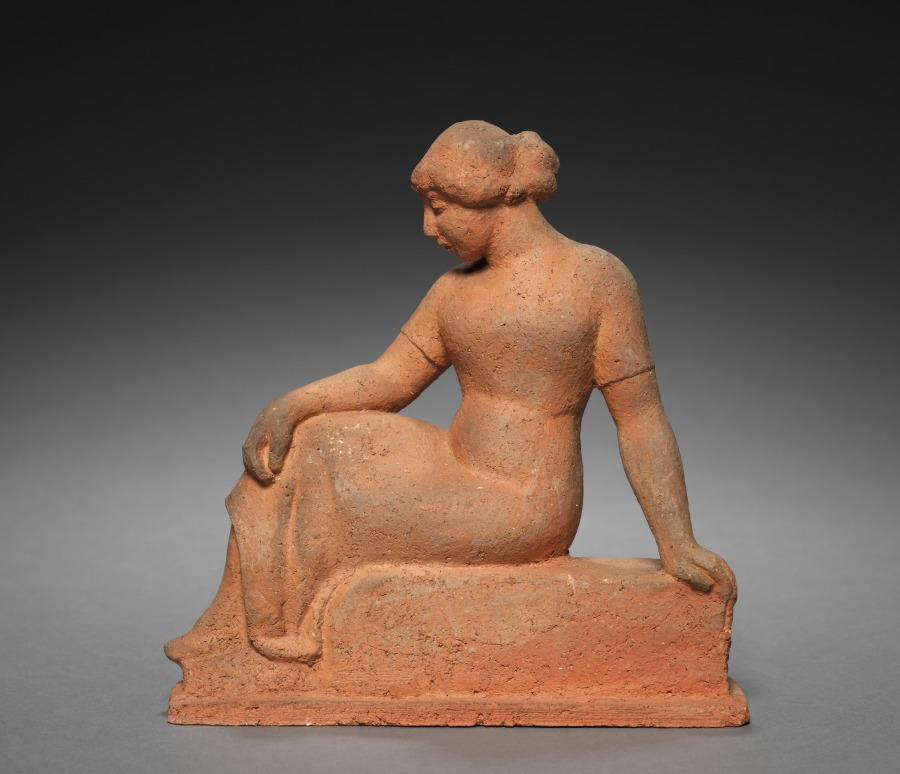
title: Seated Woman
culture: France, 20th century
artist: Aristide Maillol (French, 1861–1944)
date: c. 1900 – 1944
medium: terracotta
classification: Sculpture